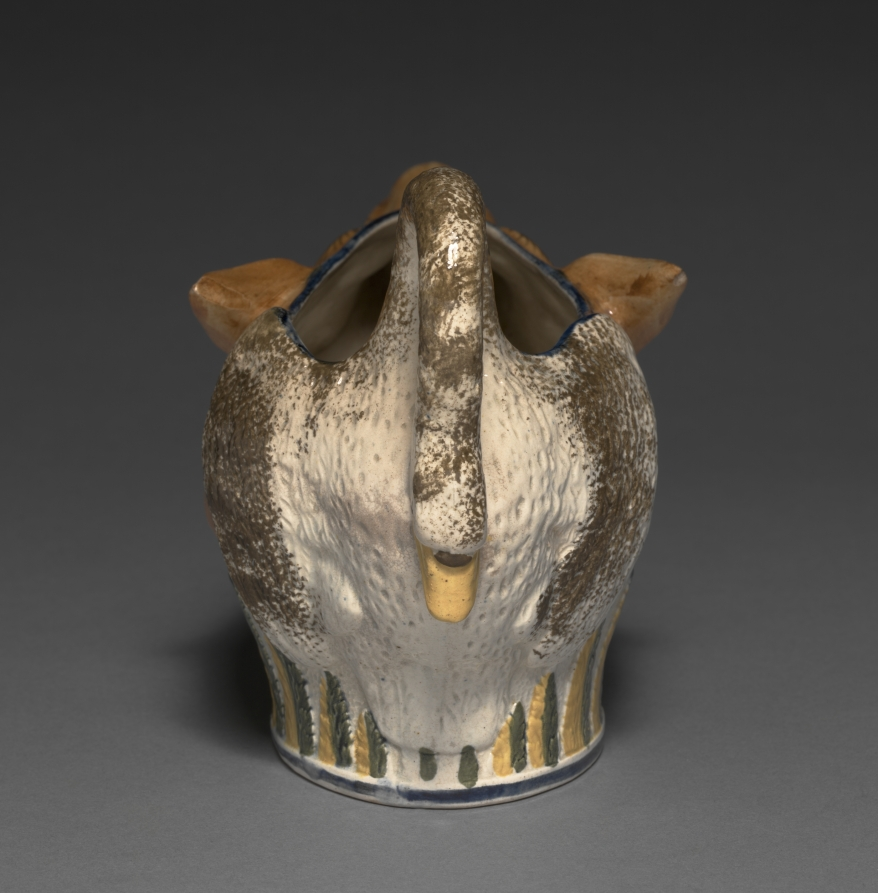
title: Fox and Swan Creamer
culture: England, Staffordshire, 18th century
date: c. 1800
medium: earthenware (Pratt ware)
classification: Ceramic